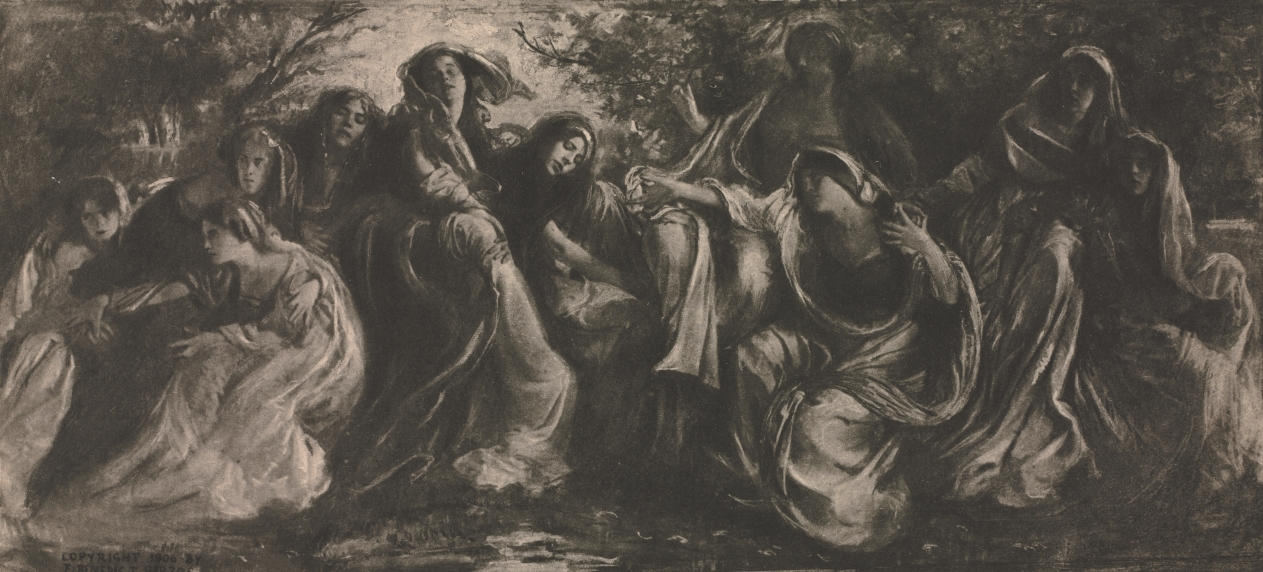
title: Camera Work: The Banks of Lethe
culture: America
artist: F. Benedict Herzog (American, c. 1859–1912)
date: 1907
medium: photogravure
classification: Bound Volume